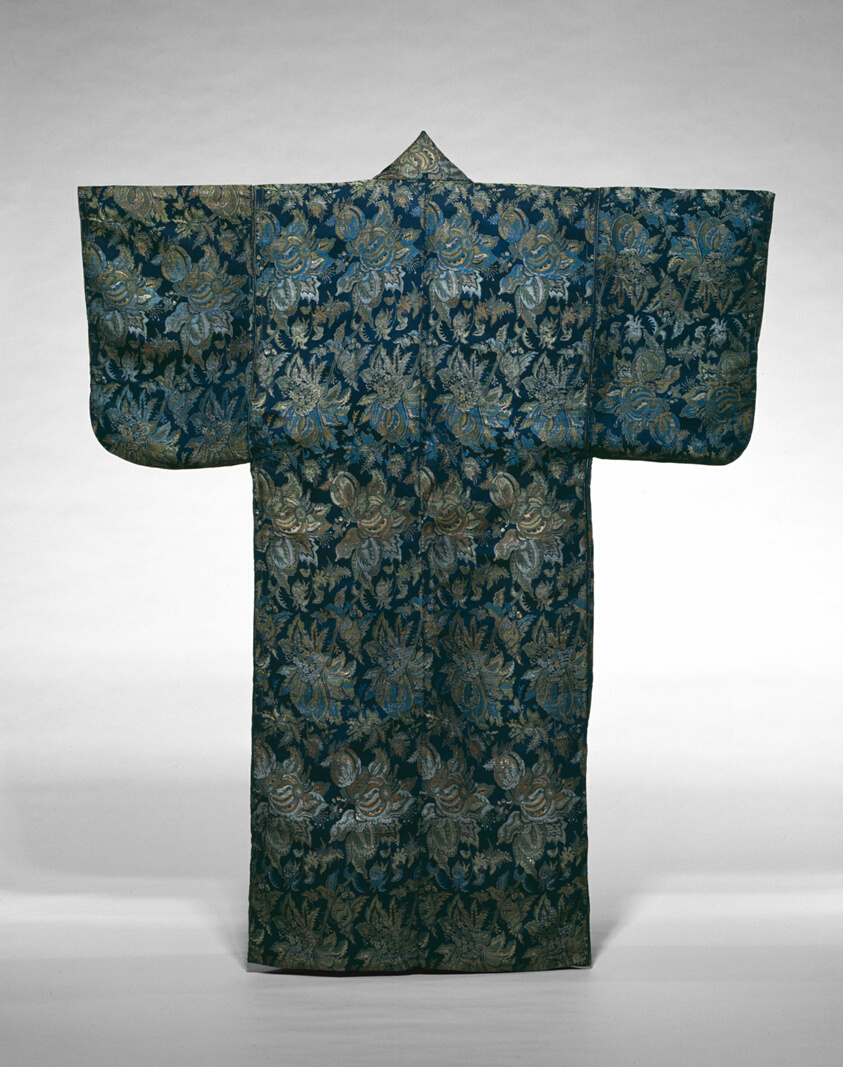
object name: Costume and Accessories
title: Kosode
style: edo (japanese period)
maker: Japan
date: Edo period (1615–1868), 1775/1800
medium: Silk and gold-leaf-over-lacquered-paper strips, warp-float faced twill weave with weft float faced twill interlacings of secondary binding warps and supplementary patterning wefts; interlined with cotton, plain weave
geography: Japan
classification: textile; costume - weaving; costume; kimonos